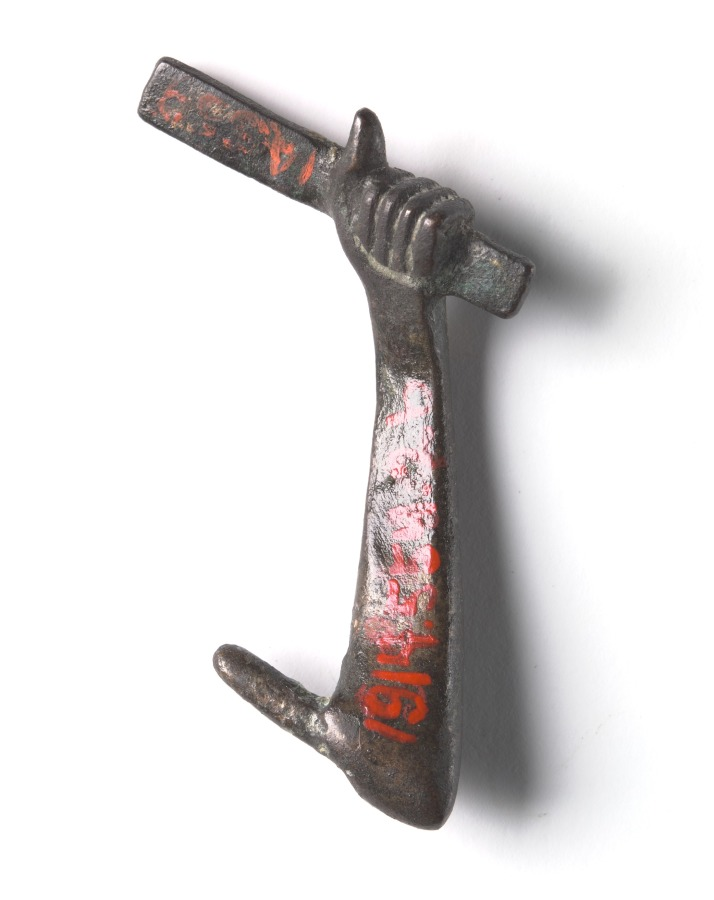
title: Bronze Mount from a "Shawabty Bundle": Arm with Scribe's Palette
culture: Egypt, Thebes, Wadi Qubbanet el-Qirud, New Kingdom (1540–1069 BCE), Dynasties 18–19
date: c. 1336–1256 BCE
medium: bronze with traces of gilding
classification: Funerary Equipment